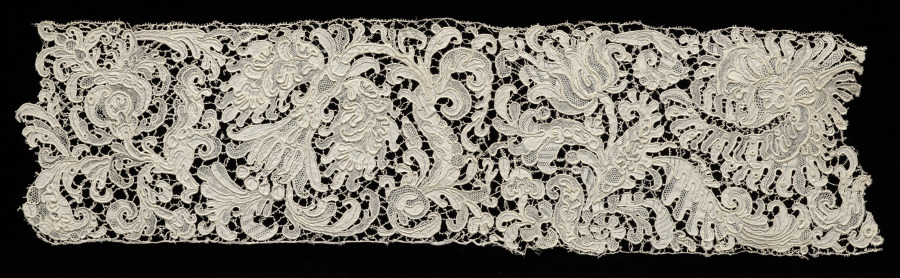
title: Lace Edging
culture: Italy, Venice, 1600s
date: 1600s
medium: Linen: needle lace (Venetian Raised Point)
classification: Lace